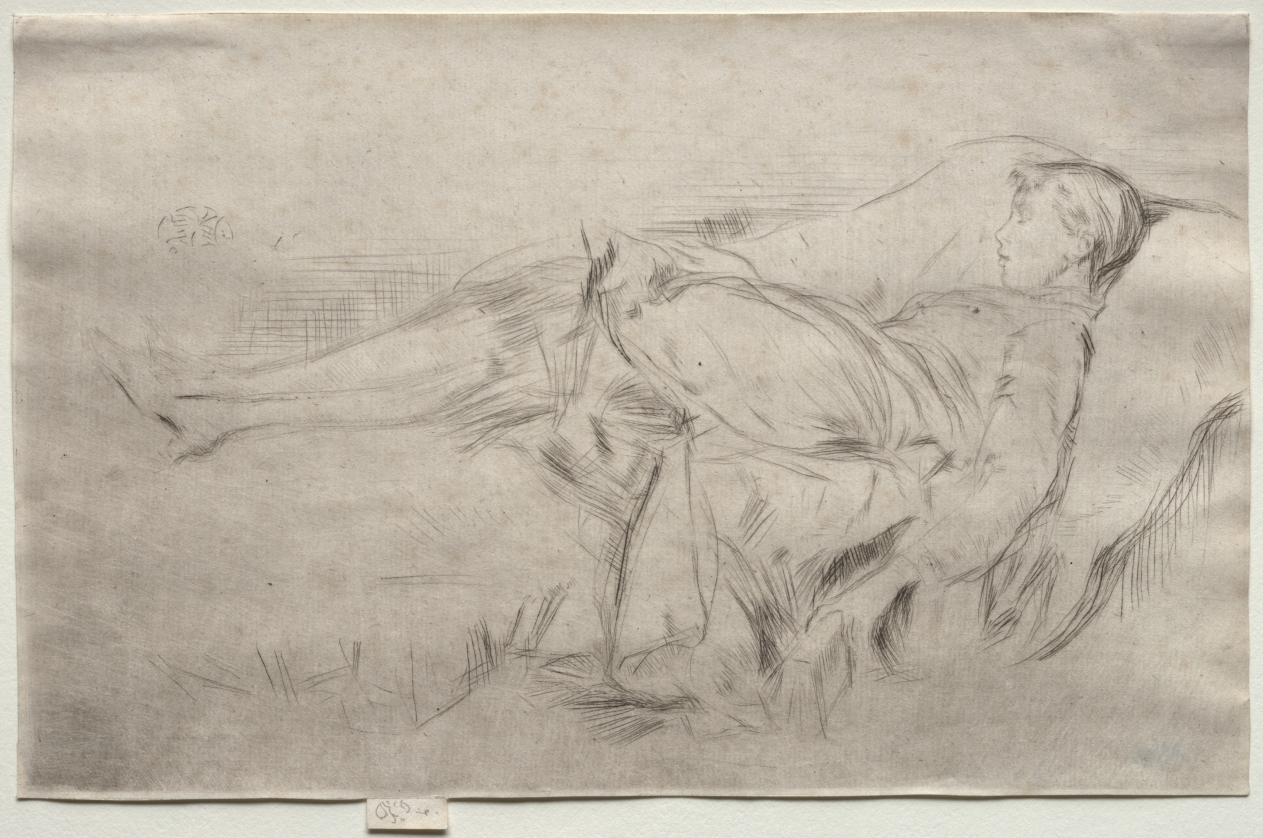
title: A Child on a Couch, No. 2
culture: America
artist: James McNeill Whistler (American, 1834–1903)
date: 1874–75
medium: drypoint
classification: Print